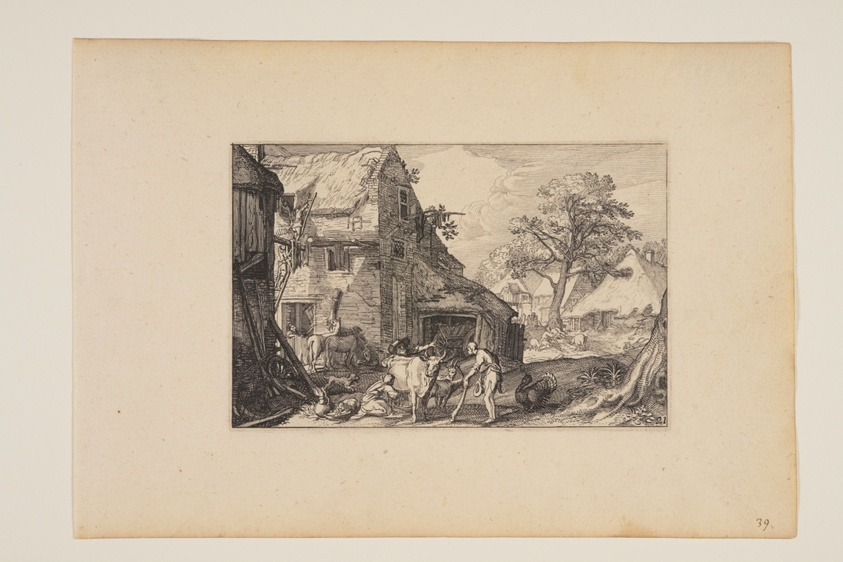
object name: Print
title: Farmyard, with Prodigal Son Among the Swine, from Landscapes (Verscheyden aerdige Lanthuysen...)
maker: Claes Jansz. Visscher (Netherlandish, c. 1550–c. 1612); after Abraham Bloemaert (Dutch, 1566–1651)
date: 1620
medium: Etching on ivory laid paper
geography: Netherlands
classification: print; paper; prints and drawing; etching